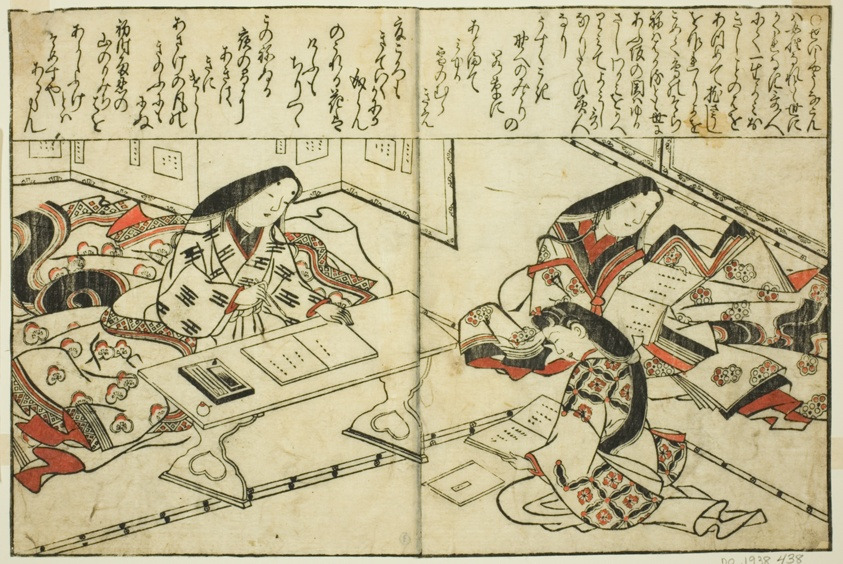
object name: Print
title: Sei Shonagon, from the illustrated book "Collection of Pictures of Beauties (Bijin e-zukushi)"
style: Japanese (culture or style)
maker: Hishikawa Moronobu (Japanese, (?)-1694)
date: c. 1683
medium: Hand-colored woodblock print; double-page illustration cut from a book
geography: Japan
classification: woodblock print; print; asian art